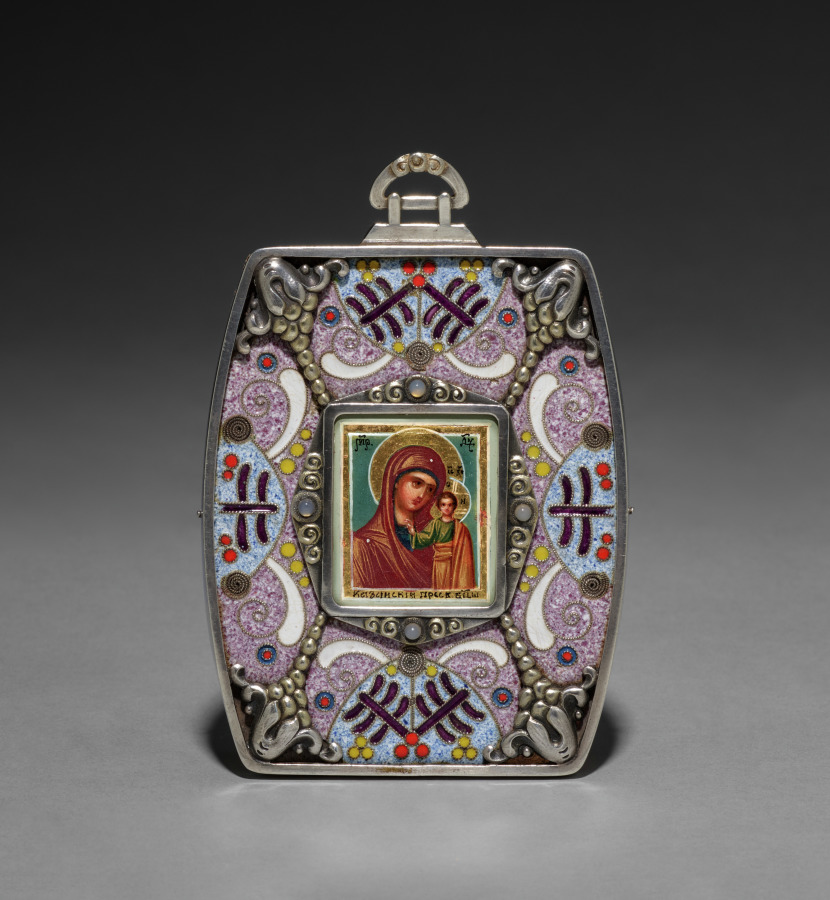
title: Pendant Icon of Our Lady of Kazan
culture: Russia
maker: House of Fabergé (Russian, 1842–1918)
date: 1915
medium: silver, enamel, glass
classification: Silver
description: One of the most revered icons in the Russian Orthodox church, Our Lady of Kazan represents the Virgin Mary as the patroness of the city of Kazan and the Holy Protectress of Russia. Fabergé embellished this icon with cloisonné (partitioned) enamel in a striking palette, as well as beaded ornaments and spiral motifs in the pan-Slavic/Neo-Russian style.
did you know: Similar to the Arts and Crafts movements, the pan-Slavic/Neo-Russian style turned to earlier handicraft traditions for inspiration.